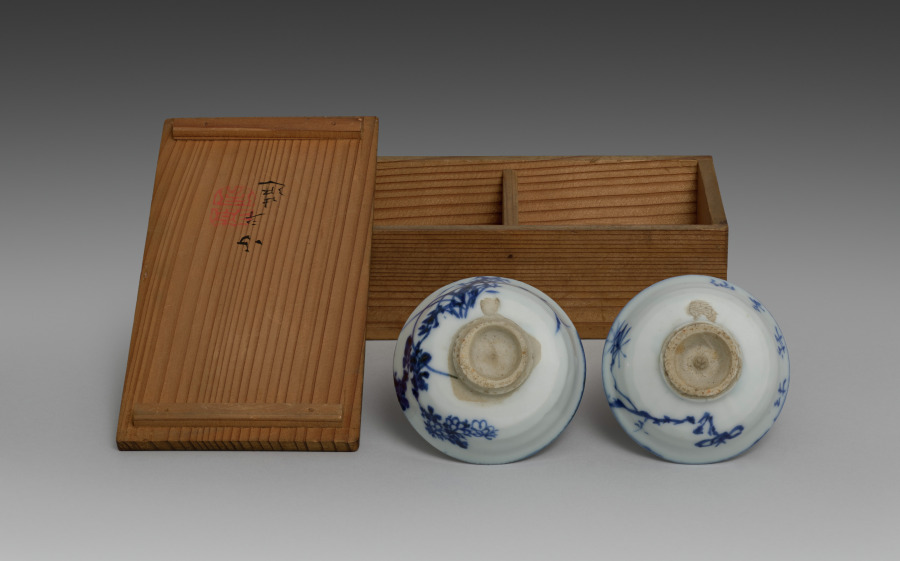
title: Sake Cups with Auspicious Flora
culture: Japan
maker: Seifū Yohei II (Japanese, 1844–1878)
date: 1861–78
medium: Pair of sake cups; porcelain with underglaze blue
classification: Ceramic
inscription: 松梅芝仙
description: Seifū Yohei II and his successor, Seifū Yohei III, trained in ink painting. Their brush skills are seen in their underglaze cobalt blue designs. One of Yohei II’s sake cups has depictions of orchid, bamboo, and chrysanthemum, representing spring, summer, and fall, while the other has pine and plum, representing winter. Just under the rim, he has also brushed the phrase “Pine, plum, and fungus immortals” (松梅芝仙).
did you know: These modest cups are important for the connoisseurship of the art of Yohei II because their original box is intact with a signature and seal on the interior of the lid.